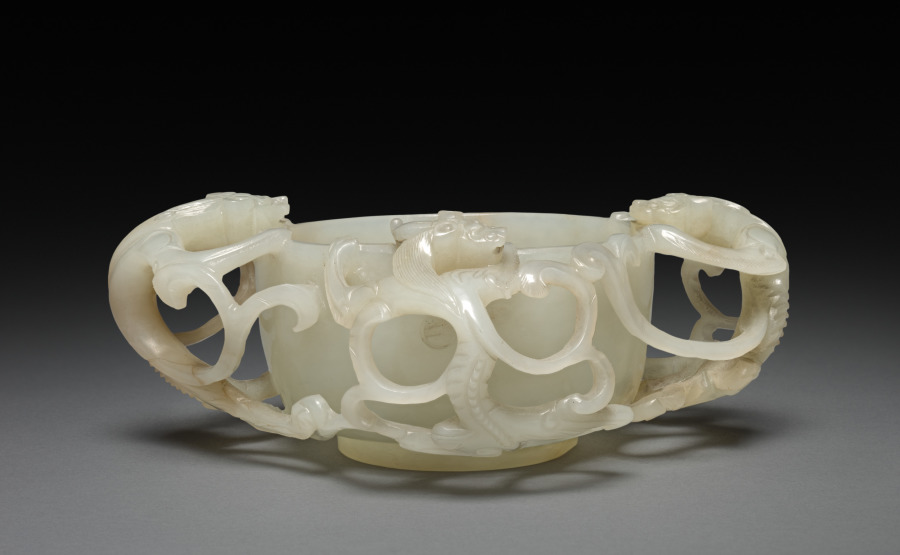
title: Cup with Dragon Handles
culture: China, Qing dynasty (1644-1911), Kangxi reign (1662-1722)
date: 1662–1722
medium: Pale gray-green white jade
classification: Jade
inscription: 萬壽長春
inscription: 壽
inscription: 子剛造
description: Three dragons, auspicious symbols for good fortune, grasp the rim of this bowl. A large shou (longevity) character is visible on the outside wall. Drinking cups with dragon handles were elite luxuries. The yellowish-white color and refined techniques are characteristic of Suzhou workshops that served the court, scholar-officials, and the merchant class. The optimistic attribution to Lu Zigang (late 1500s), a jade master recorded to have been active in Suzhou, suggests that its maker used the master’s name to attract wealthy clients eager to demonstrate their refined taste and connoisseurship.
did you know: Auspicious inscriptions on the base and front of the jade cup convey wishes for longevity.